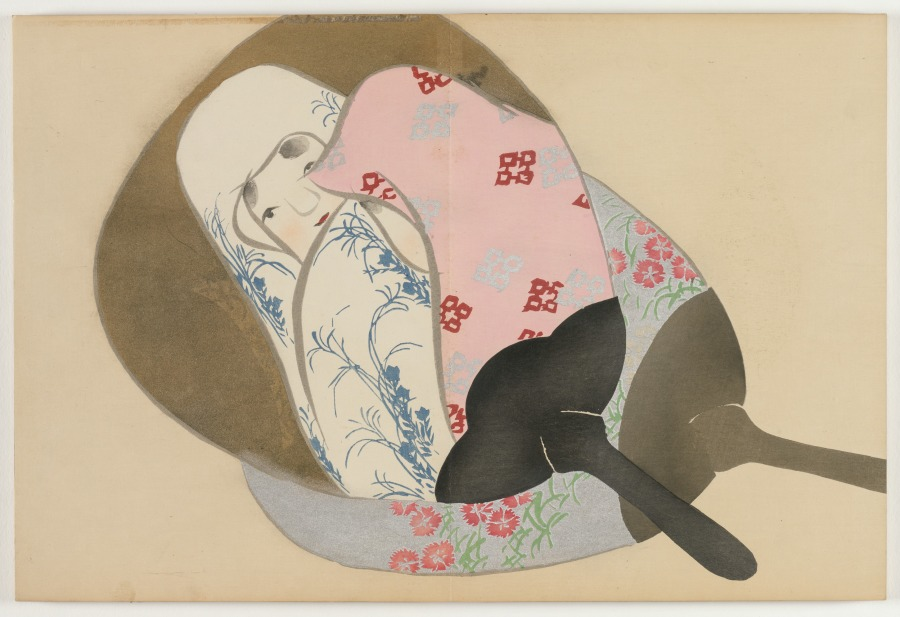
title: Flowers of a Hundred Worlds (Momoyogusa): Fans (Senmen)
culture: Japan, Meiji period (1868–1912)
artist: Kamisaka Sekka (Japanese, 1866–1942)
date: 1909–10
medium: color woodcuts with gold and silver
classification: Bound Volume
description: This print from a set of three woodblock printed albums displays the graphic design prowess of Kamisaka Sekka. The images were first distributed one by one to subscribers to the series but later were reissued in bound form, like this book, for mass consumers. Each print features a vignette taken from nature or Japanese literature. Many of the scenes have a long history in Japan, originating in the 900s or 1000s and having been interpreted by all manner of artists since that time. Sekka’s selections hew closely to precedents from the Rinpa style originated by painter Tawaraya Sōtatsu (c. 1570–c. 1640) and calligrapher Hon’ami Kōetsu (1558–1637).